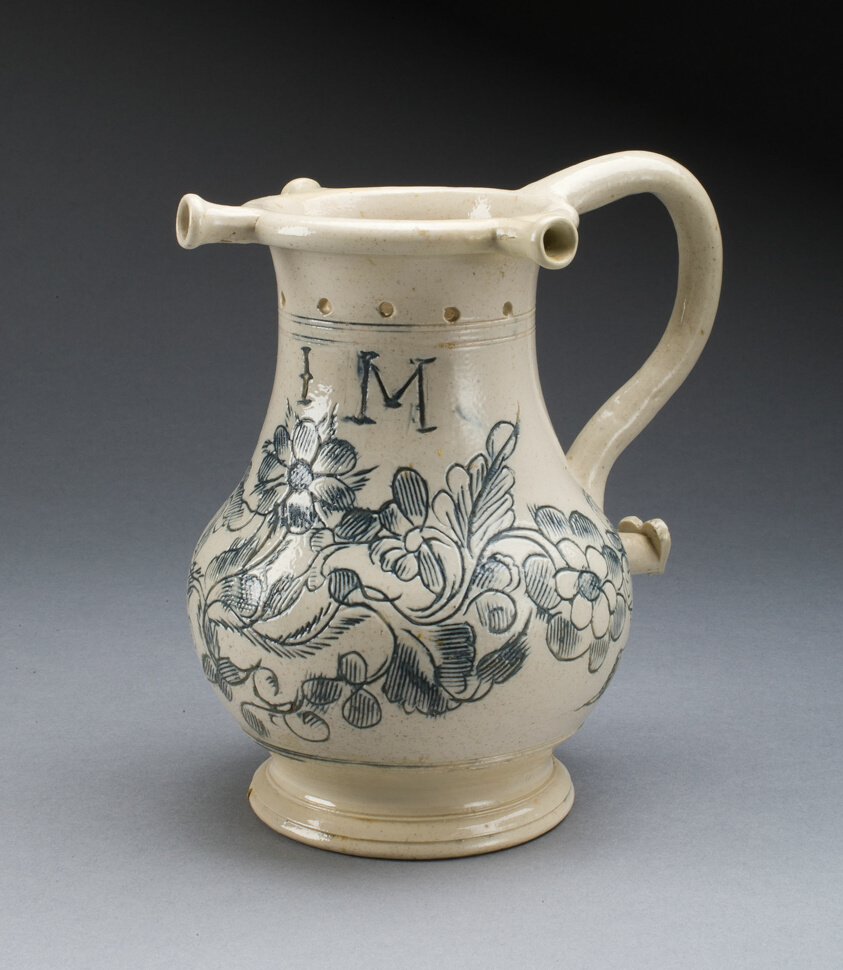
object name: Ceramics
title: Puzzle Jug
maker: Staffordshire, England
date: c. 1765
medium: Salt-glazed stoneware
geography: Staffordshire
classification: salt-glazed stoneware; ceramics; european decorative arts; stoneware